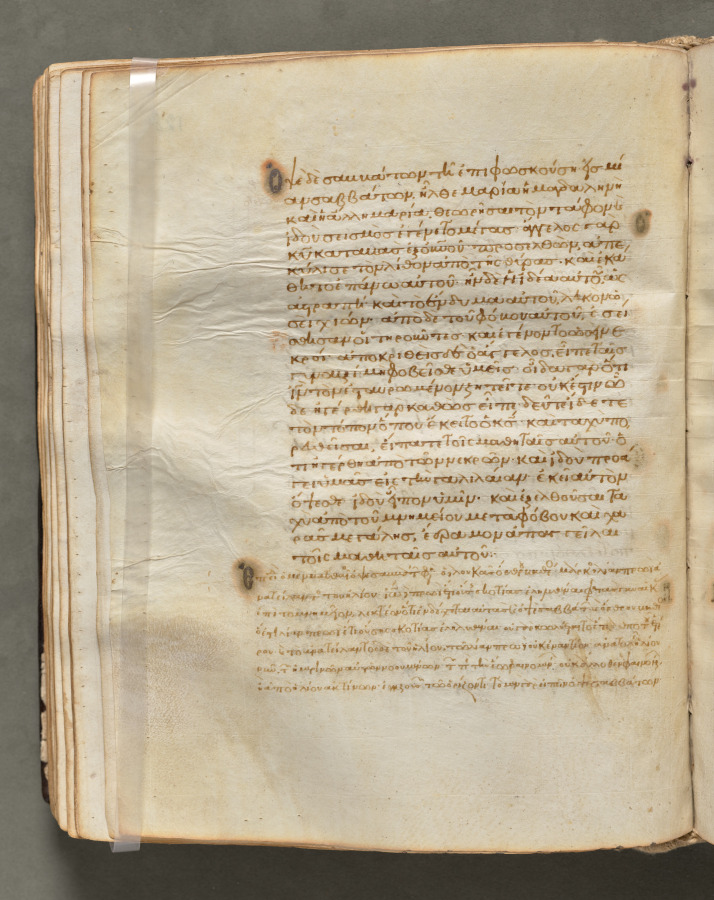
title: Text, folio 128 (verso), from a Gospel Book with Commentaries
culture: Byzantium, Constantinople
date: c. 1000–1100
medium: ink, tempera, and gold on vellum; leather binding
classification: Bound Volume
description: Each of the four gospels in this book opens on a page with brilliantly illuminated borders depicting the author of the text as well as birds-principally peacocks, symbols of the immortality of the soul-and fountains, representing the fountain of life and the salvation of the soul. This volume consists of 428 leaves with texts in Greek. Its level of sophistication suggests that it was probably written and decorated in a monastery in Constantinople.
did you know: Gospel Books were carried in procession through Byzantine churches.